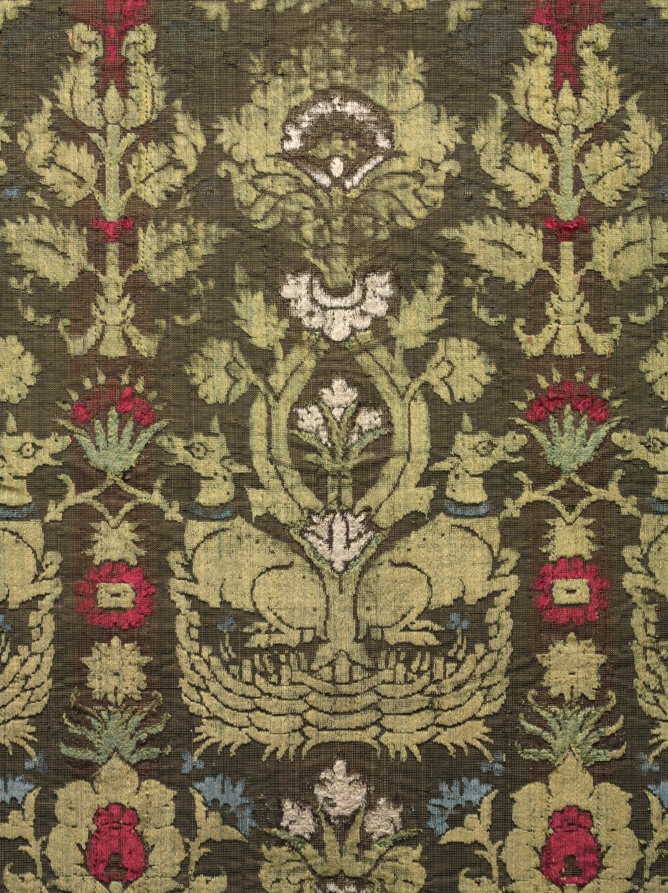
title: Six-Color Chasuble Front with Animal Pattern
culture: Italy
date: 1415–25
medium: Silk, polychrome velvet with cut pile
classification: Velvet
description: Few velvets were woven in Italy with as many as six colors of pile, such as this front panel from a chasuble. The chasuble is the main sleeveless outer vestment worn by priests while officiating during Mass. The resulting weave highlights a complex animal pattern in which deer appear behind a fence and peacocks flank a fountain above—an artistic fashion that emerged in the 1300s. This complicated weaving process was gradually abandoned during the 1400s in favor of monochrome floral patterns that were often embellished with gold.